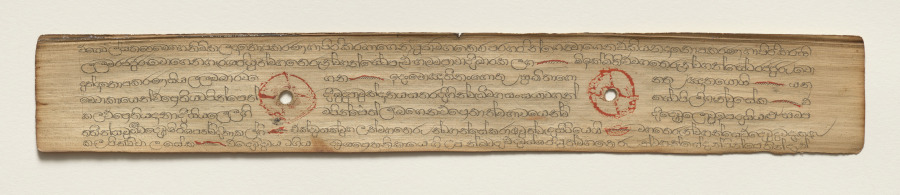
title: Leaf from a Buddhist Manuscript (verso)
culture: Sri Lanka, Singhalese, Late 17th century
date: c. 1700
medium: fiber paper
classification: Manuscript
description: Palm leaf material is still used for manuscripts in Sri Lanka. The palm leaves are prepared first by boiling them, drying them in the sun, and then rubbing them with oils. Scribes then use a metal stylus to incise the text. Then charcoal powder is wiped across the pages, filling in only the inscribed lines.